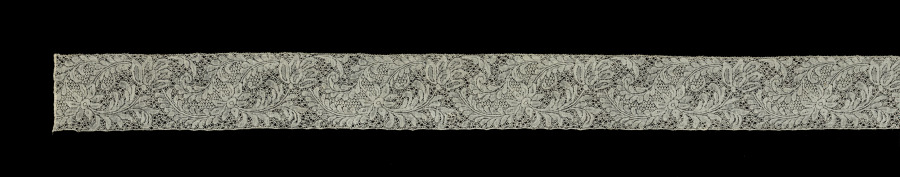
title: Lace Insertion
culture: Belgium, Binche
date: 1700–1750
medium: Bobbin lace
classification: Lace